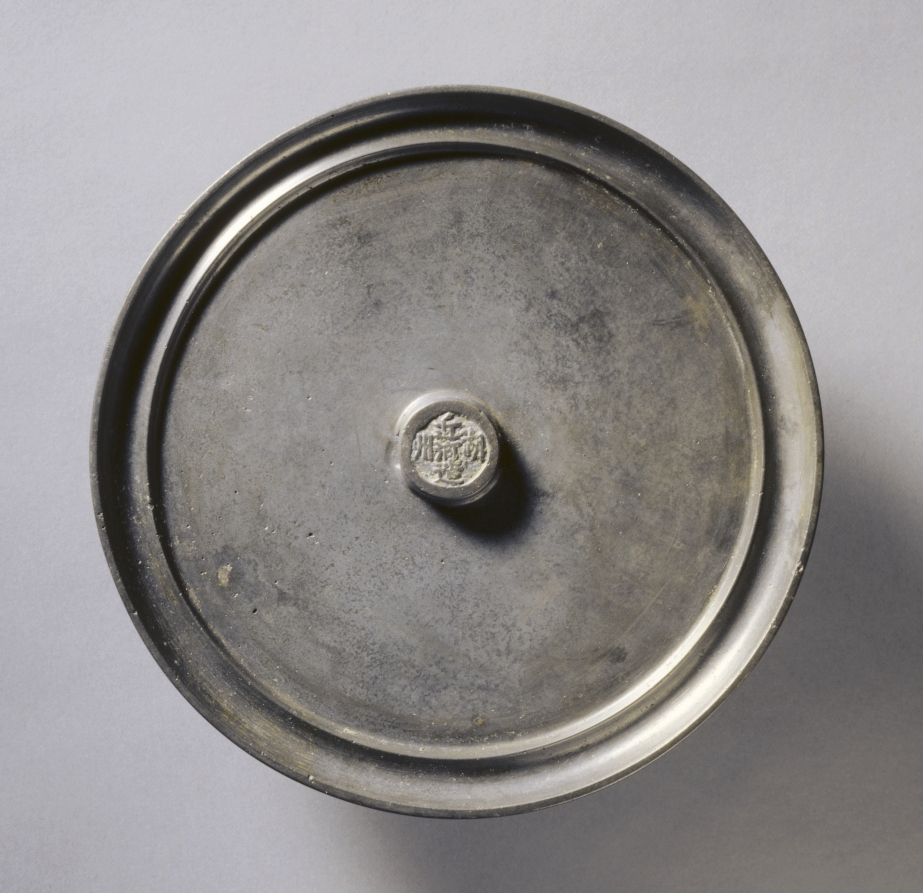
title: Huzhou Mirror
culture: China, Huzhou, Ming dynasty (1368-1644)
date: 1500s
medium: bronze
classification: Metalwork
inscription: 湖州近河造